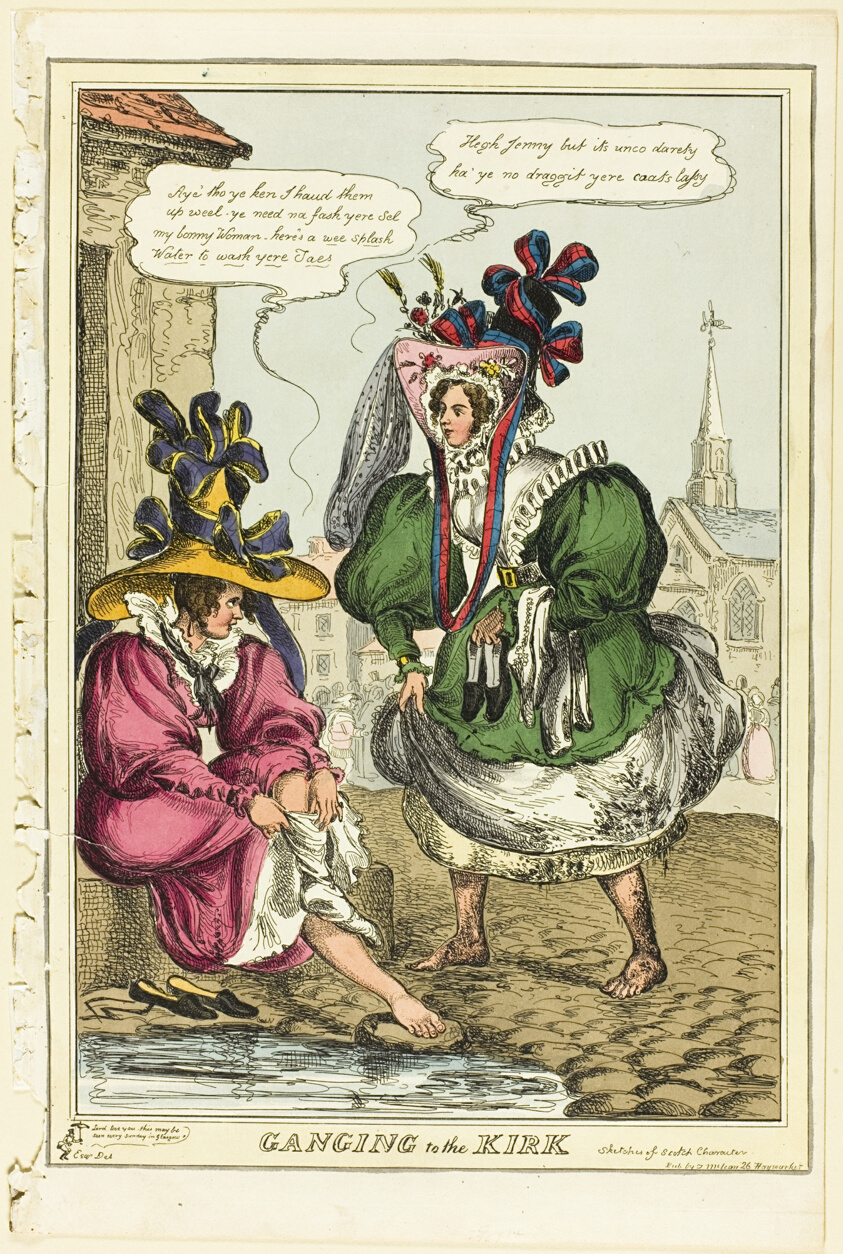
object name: Print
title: Ganging to the Kirk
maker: George Moutard Woodward (English, c. 1760-1809); published by Thomas Tegg (English, 1776-1845)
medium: Etching in black, with hand-colored additions, on cream wove paper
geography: England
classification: etching; print; prints and drawing